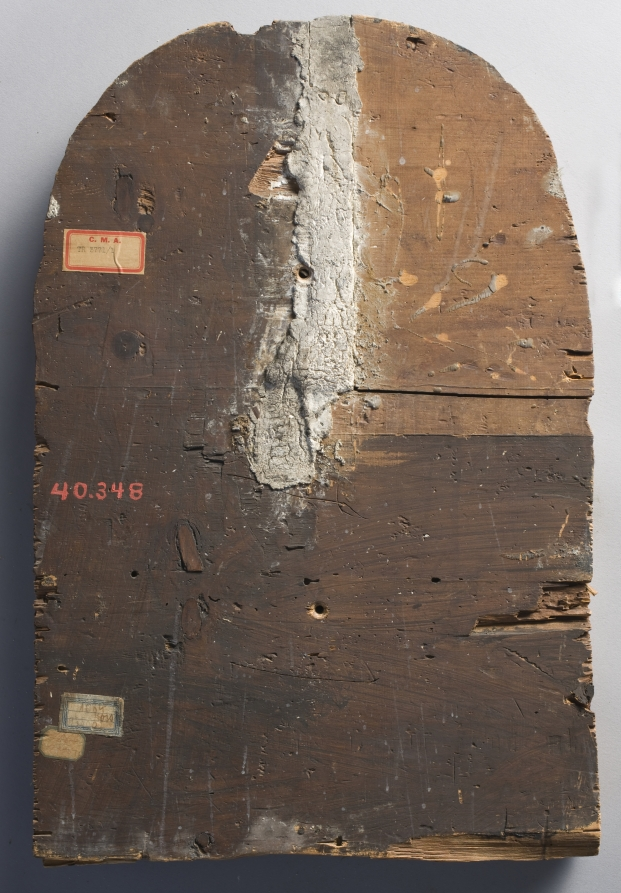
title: Portrait of Francesco Sforza (frame)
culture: Italy, Lombardy, 15th century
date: 1450–1499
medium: wood with gesso, polychromed and gilded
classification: Sculpture